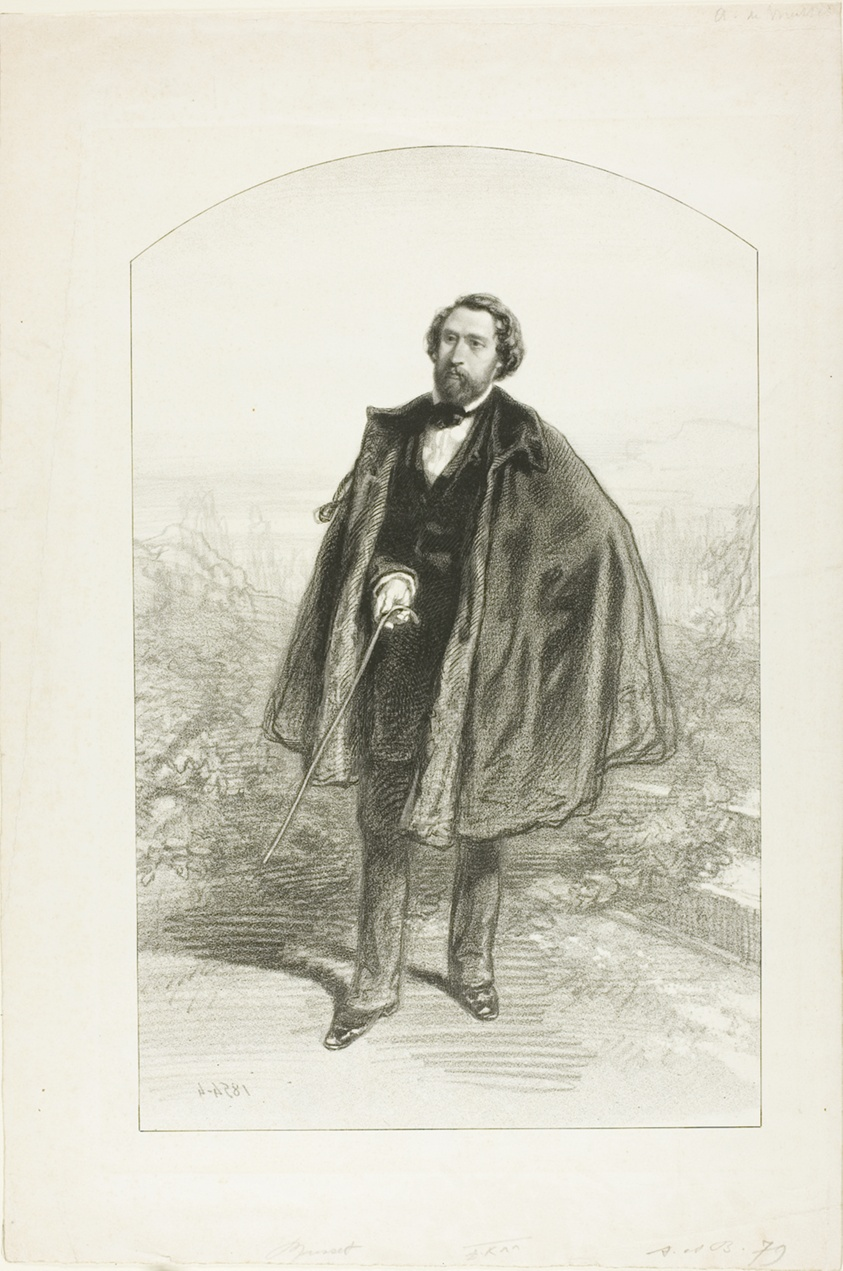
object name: Print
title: Alfred de Musset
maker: Paul Gavarni (French, 1804-1866)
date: 1854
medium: Lithograph in black on cream wove paper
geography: France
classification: lithograph; print; prints and drawing